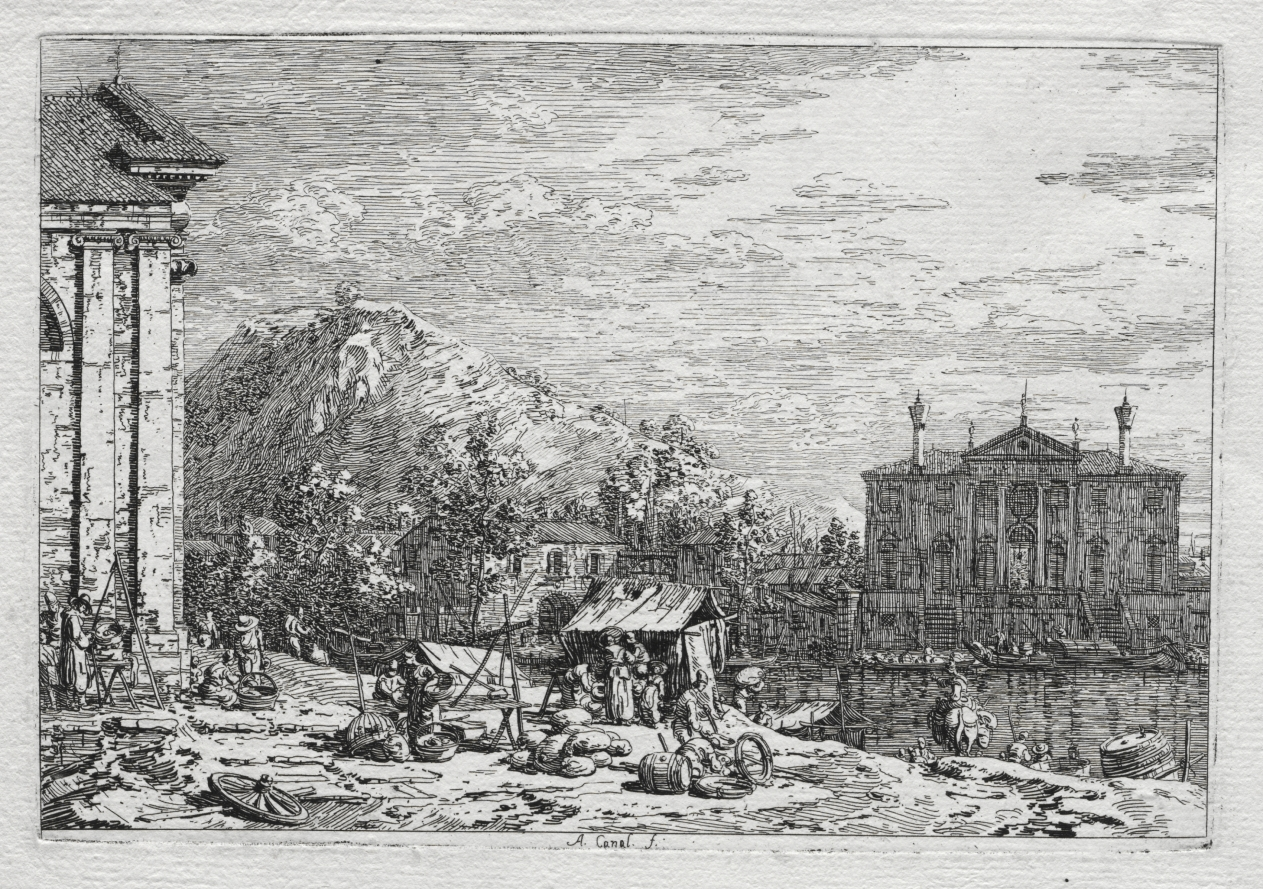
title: Views of Venice and Environs: A City Beyond a River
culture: Italy, 18th century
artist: Antonio Canaletto (Italian, 1697–1768)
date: 1700s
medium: etching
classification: Print